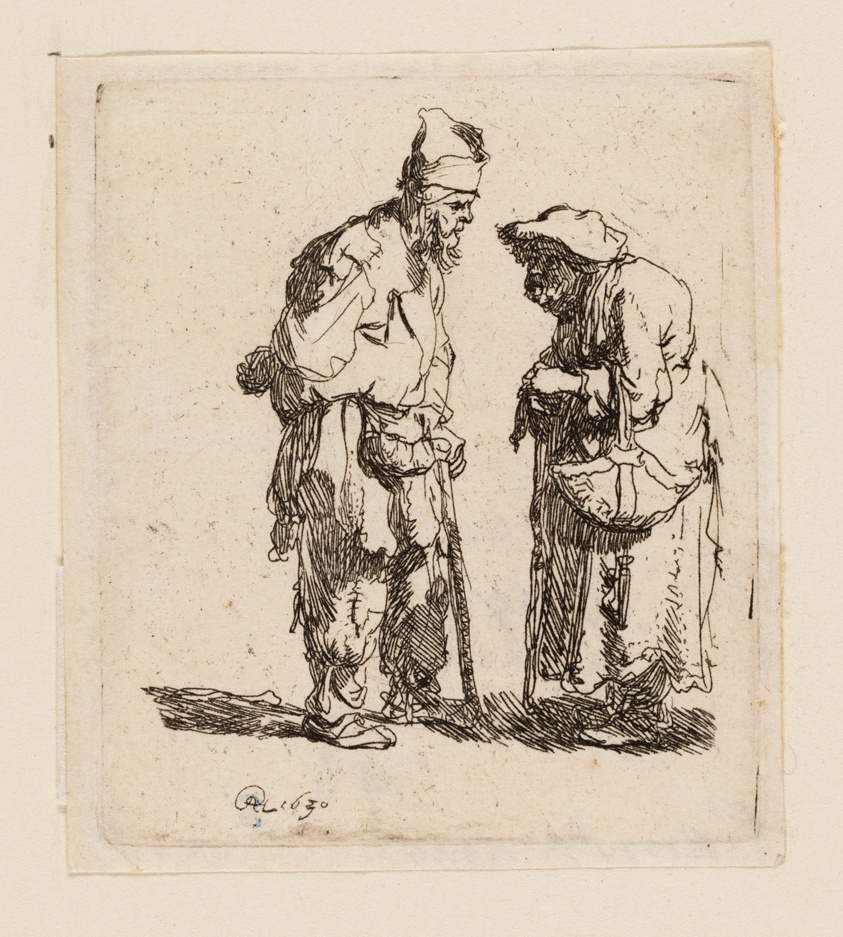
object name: Print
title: Beggar Man and Beggar Woman Conversing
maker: Rembrandt van Rijn (Dutch, 1606-1669)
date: 1630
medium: Etching on ivory laid paper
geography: Holland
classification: etching; print; prints and drawing; paper